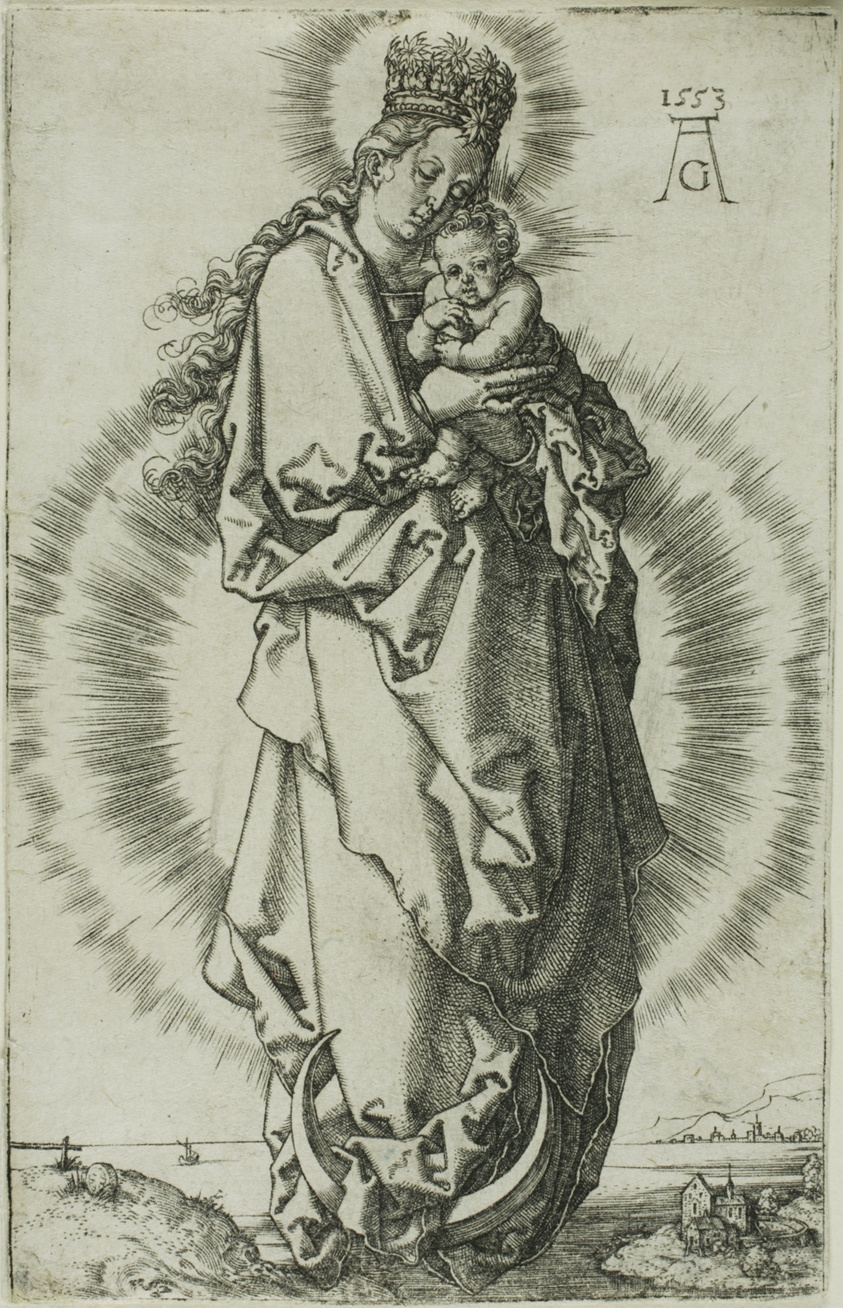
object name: Print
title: The Virgin and Child on a Crescent Moon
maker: Heinrich Aldegrever (German, 1502-c.1560)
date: 1553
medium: Engraving in black on ivory laid paper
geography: Germany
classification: engraving; print; prints and drawing